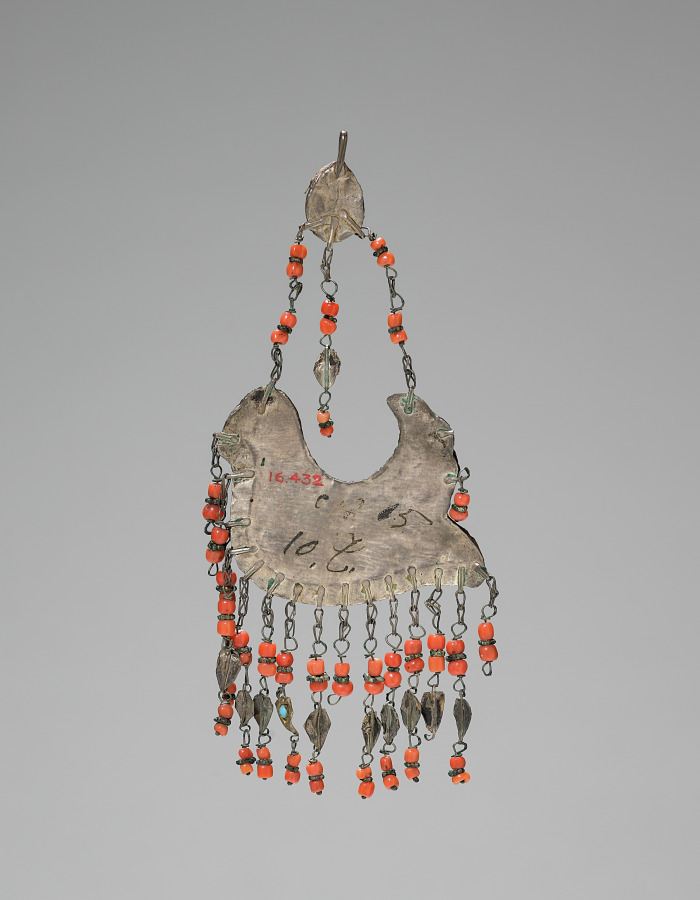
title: Pendant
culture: India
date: 1800s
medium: silver gilt with turquoise and coral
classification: Jewelry